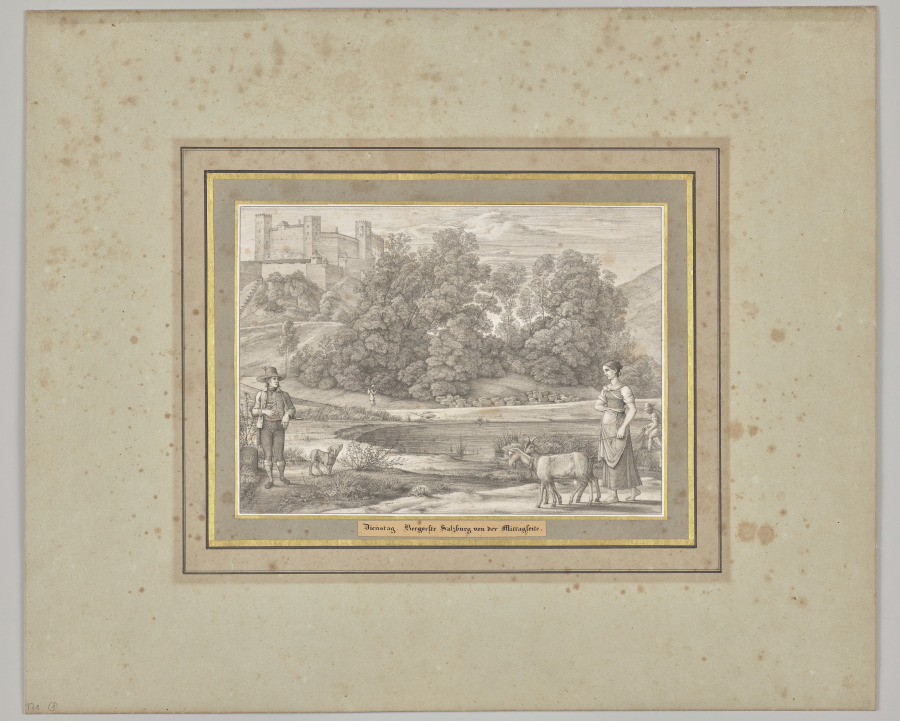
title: Tuesday. Bergveste Salzburg from the Midday Side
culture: Germany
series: Seven Areas from Salzburg and Berchtesgaden. Arranged according to the seven days of the week, connected by two allegorical sheets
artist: Ferdinand Olivier (German, 1785–1841)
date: 1818–23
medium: lithograph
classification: Print